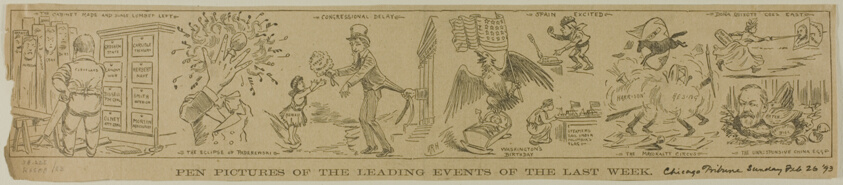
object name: Print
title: Pen Pictures of the Leading Events of the Last Week, from Chicago Tribune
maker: H. R. H. (American, 19th century)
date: published Feb 26, 1893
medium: Lithograph on newsprint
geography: United States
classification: lithograph; print; prints and drawing